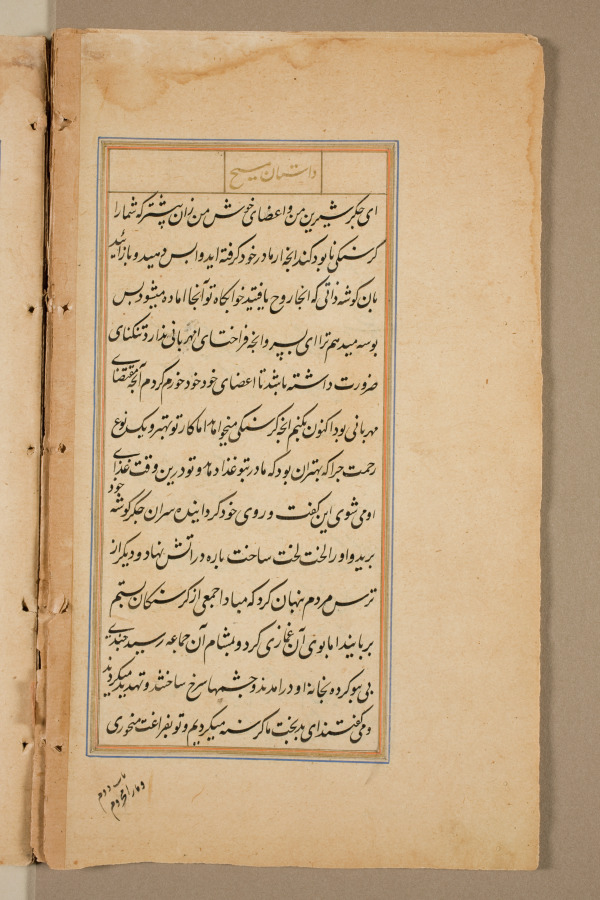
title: Text page from a Mirror of Holiness (Mir’at al-quds) of Father Jerome Xavier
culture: Mughal India, Allahabad, made for Prince Salim (1569–1627)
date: 1602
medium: Ink and gold on paper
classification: Manuscript